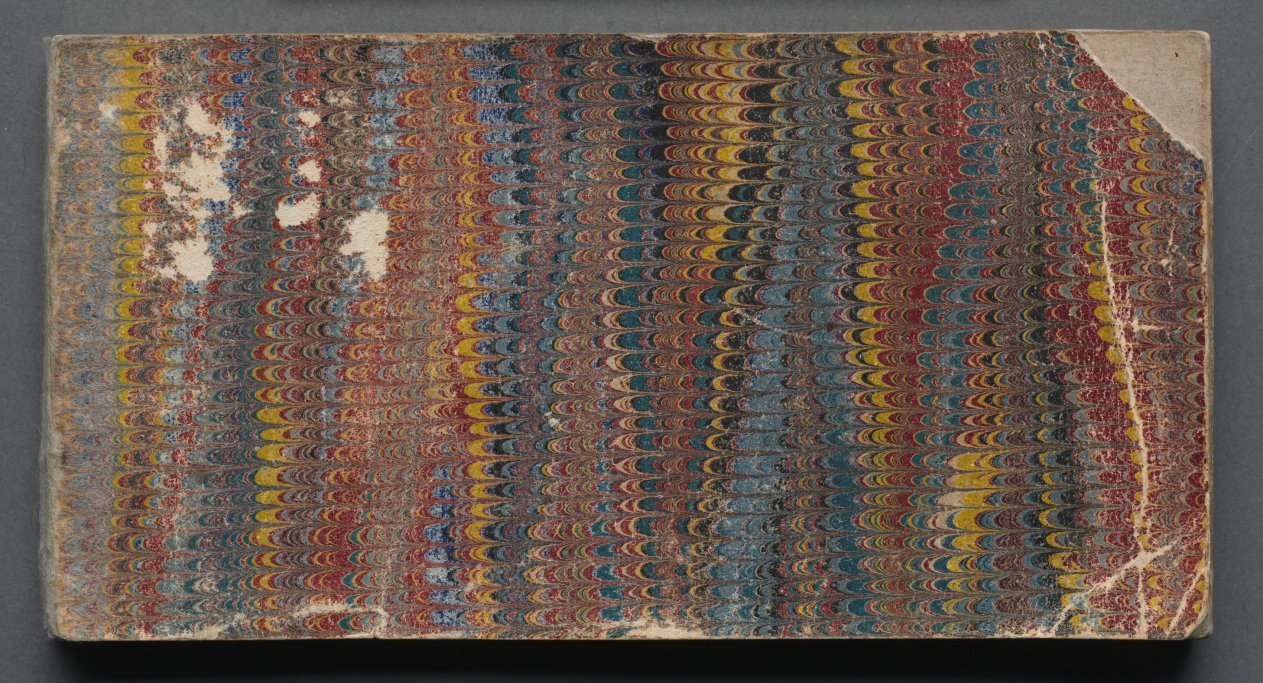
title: Sketchbook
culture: France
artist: Ernest Meissonier (French, 1815–1891)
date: c. 1860s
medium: graphite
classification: Bound Volume